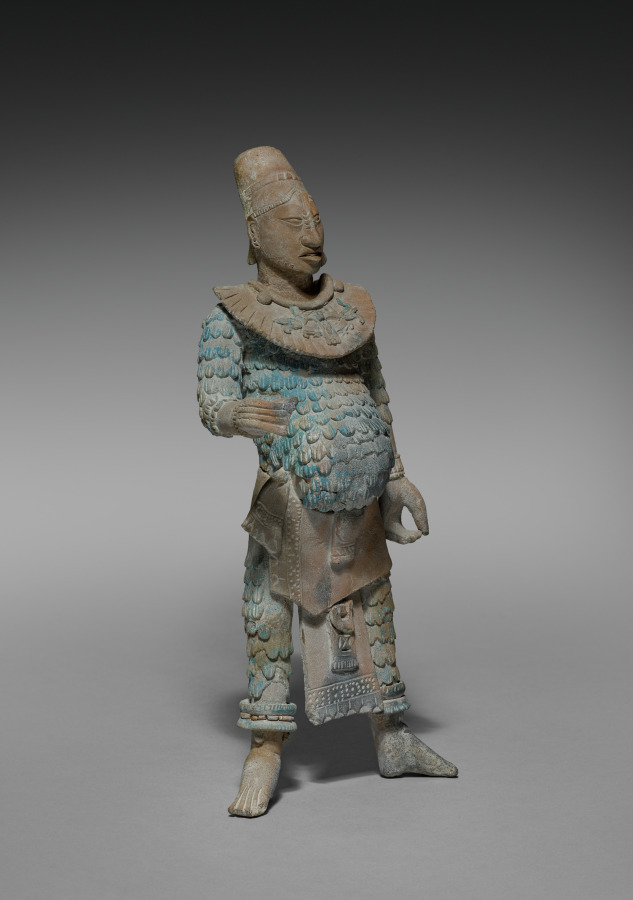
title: Warrior Figurine with Removable Headdress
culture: Mexico, Yucatán, Jaina Island region, Campeche, Maya style (250-900)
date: 600–900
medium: earthenware with pigment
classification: Sculpture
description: The major offerings placed in the Maya graves of Jaina Island were ceramic figurines, some of Mesoamerica's finest, that depict deities and humans in a variety of roles. This warrior, his headdress removable, once probably held weapons and wears either quilted cotton armor or the feathered uniform of a military order. We don't know why such figures are often pot-bellied.